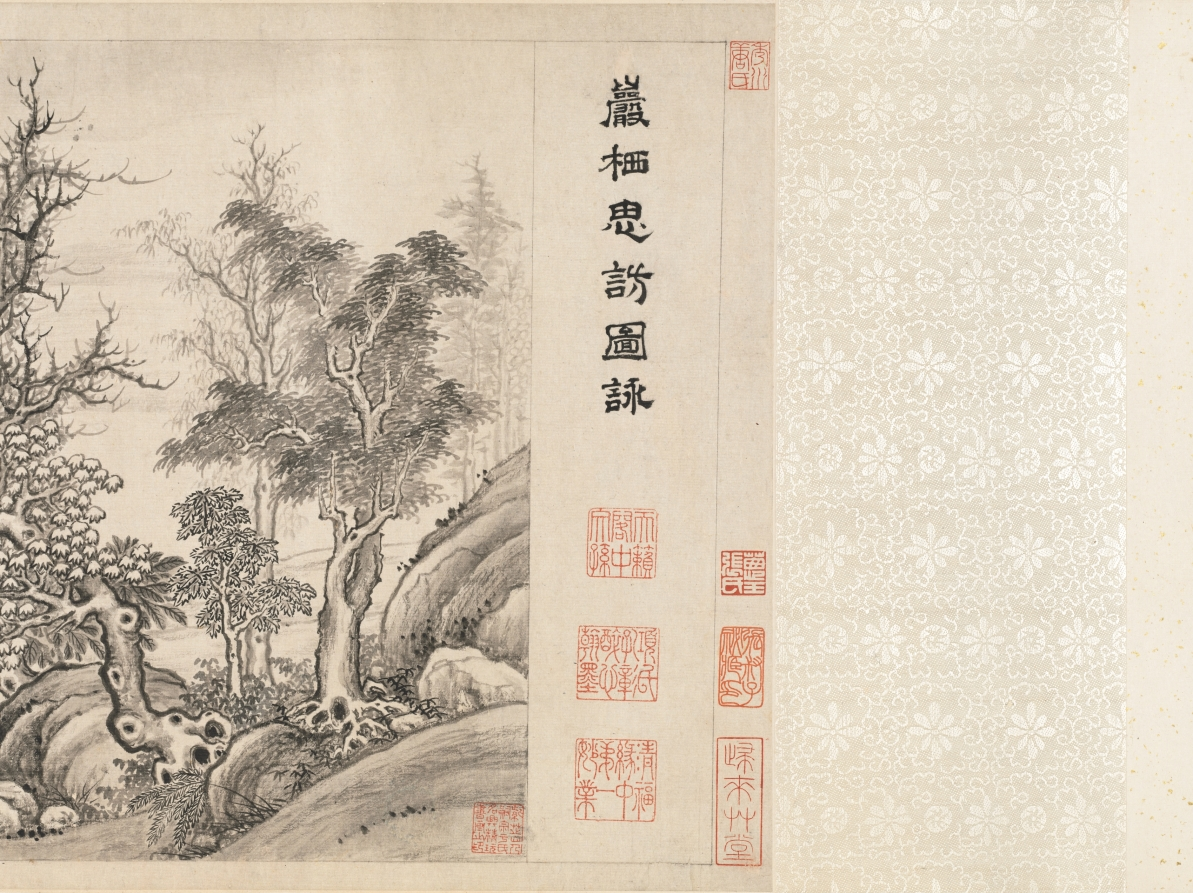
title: Meditative Visit to a Mountain Retreat: In Picture and in Words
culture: China, Ming dynasty (1368–1644)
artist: Xiang Shengmo (Chinese, 1597–1658)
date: 1648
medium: handscroll; ink on paper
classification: Painting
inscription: Artist's title and 3 seals (in front of painting): [title] Meditative Visit to a Mountain Retreat: In Picture and in Words 巖栖思訪圖詠 [3 seals] Tian lai ge zhong wen sun 天籟閣中文孫; Xiang shi kong zhang zui xin han mo 項氏孔彰醉心翰墨; Qing fu yuan zhong di yi miao ye 清福緣中第一妙業.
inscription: [印] 兔烏叟; 考古正今. 觀斯人兮何逍遙，非逍遙兮思其友。 思其友兮天一方，欲一訪之難回首。 松耶柏耶稱後凋，巖穴霏微何二酉。 山兮水兮人悠悠，遠莫致之神交否？ 河關一向望不及，言笑于今更非偶。 問游魚兮樂何深？問飛鳥兮歸何藪？ 問猿鶴兮何親疎？問鹿豕兮何夭壽？ 問白雲兮從何來？問流泉兮向何走？ 問漁樵兮何江山？問草木兮何畝畎？ 問春秋兮何炎涼？問世人兮何長久？ 問日月兮何晦明？曾見當時烏兔叟？ 戊子嘉平之初偶作此圖并題。 胥樵項聖謩識。 [印] 兔烏叟; 項氏孔彰; 未喪斯文.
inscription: 13 additional seals: 4 of Tang Zuomei 唐作梅 (late 18th–19th century); 3 of Zhang Baixi 張百熙 (1847–1907); 4 of Zhang Heng 張珩 (1915–1963); 2 unidentified.